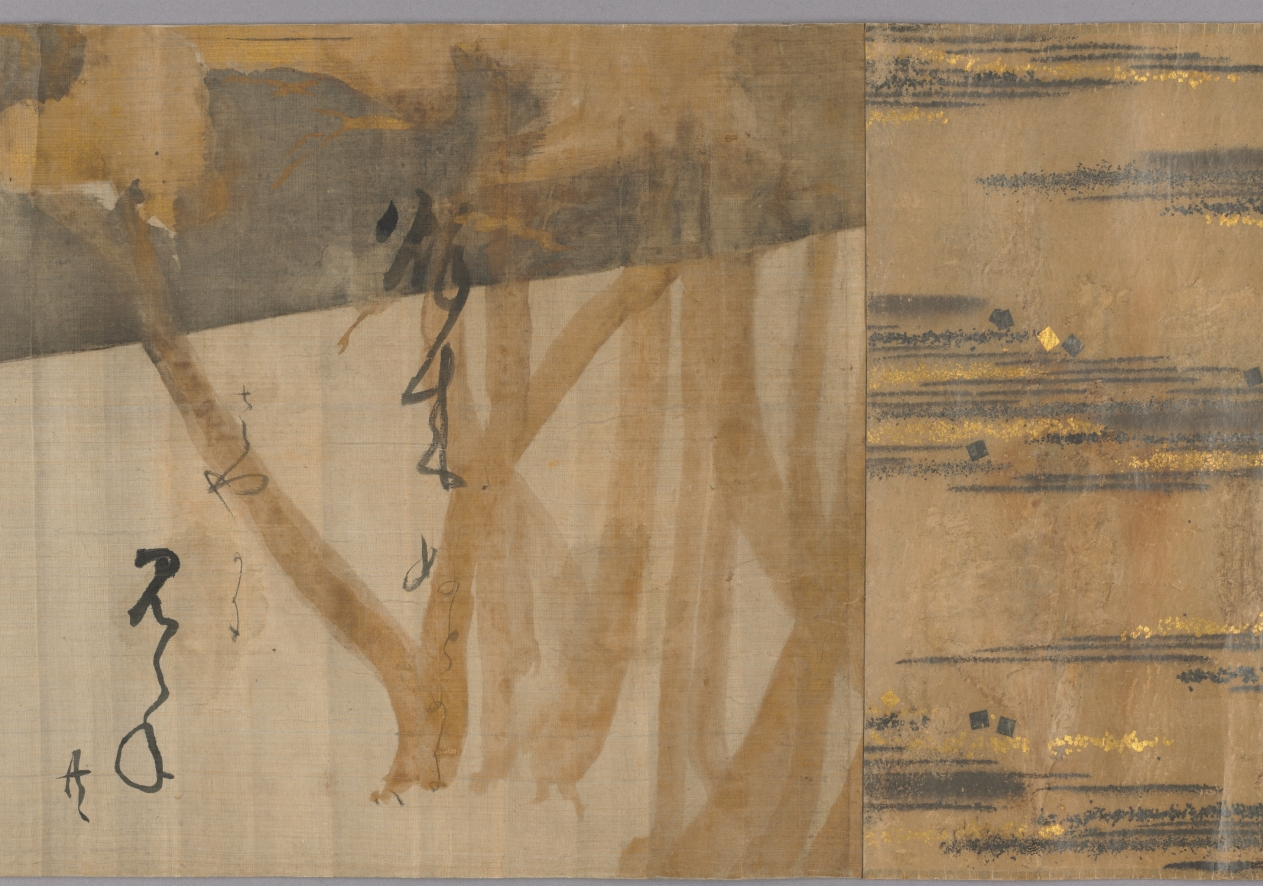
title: Selections from the Collection of Japanese Poems from Ancient and Modern Times (Kokin wakashū) with Design of Pines Along the Shore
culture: Japan, Momoyama period (1573-1615) to Edo period (1615-1858)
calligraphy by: Hon'ami Kōetsu (Japanese, 1558–1637)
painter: attributed to Tawaraya Sōtatsu (Japanese, c. 1570–c. 1640)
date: 1600s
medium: handscroll; ink on silk with gold and silver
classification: Calligraphy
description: The calligrapher and craftsman Hon’ami Kōetsu frequently collaborated with Tawaraya Sōtatsu, a painter who ran a studio that produced fans and screens. Sōtatsu’s work featured abstracted and flattened shapes, fields of color and gold, and asymmetry. In particular, motifs that appeared in small scale, such as flora and fauna, in early decorated Japanese papers were painted in a larger scale—blown up as if seen under a magnifying glass. For this handscroll, Kōetsu brushed poems from the autumn section of a poetry anthology onto silk with a landscape of pines in gold and silver likely painted by Sōtatsu.